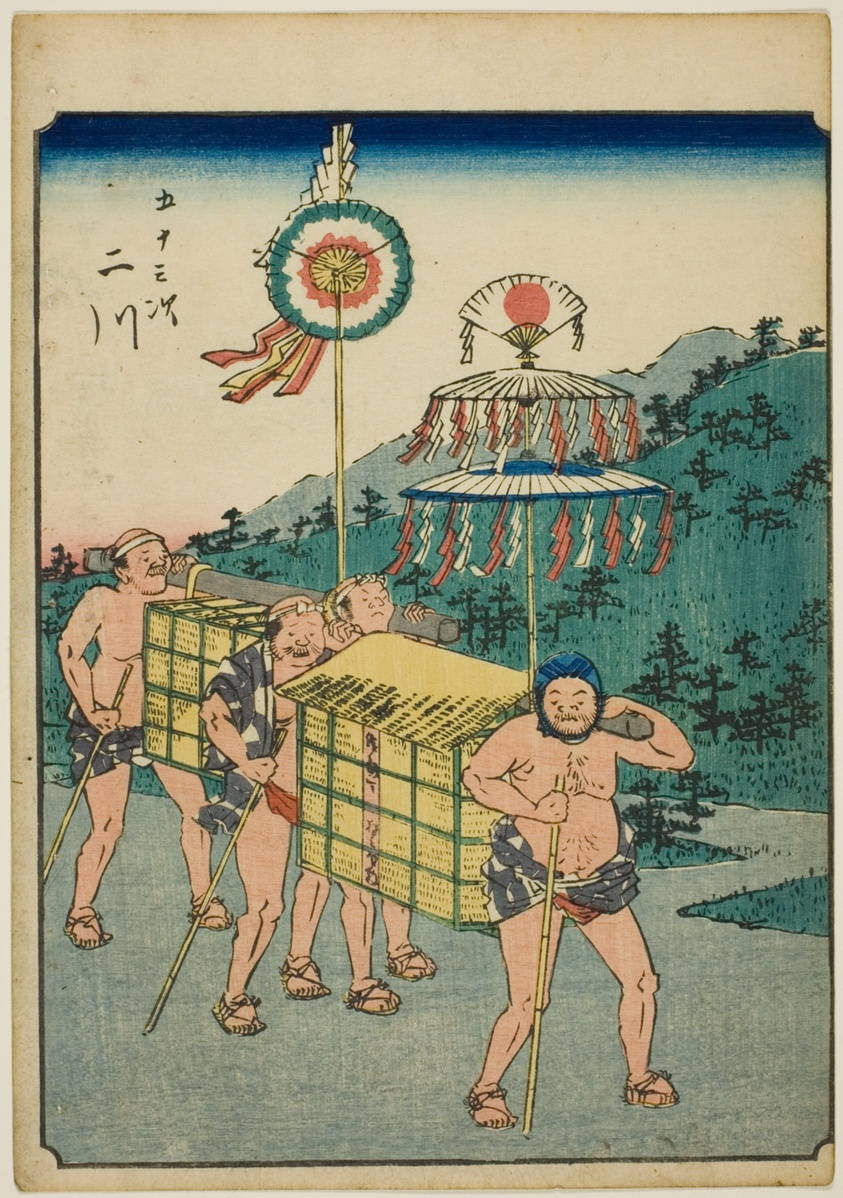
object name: Print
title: Futagawa, from the series "Fifty-three Stations [of the Tokaido] (Gojusan tsugi)," also known as the Figure Tokaido (Jinbutsu Tokaido)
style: Japanese (culture or style)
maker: Utagawa Hiroshige 歌川 広重; Japanese, 1797-1858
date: 1852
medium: Color woodblock print; chuban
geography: Japan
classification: woodblock print; print